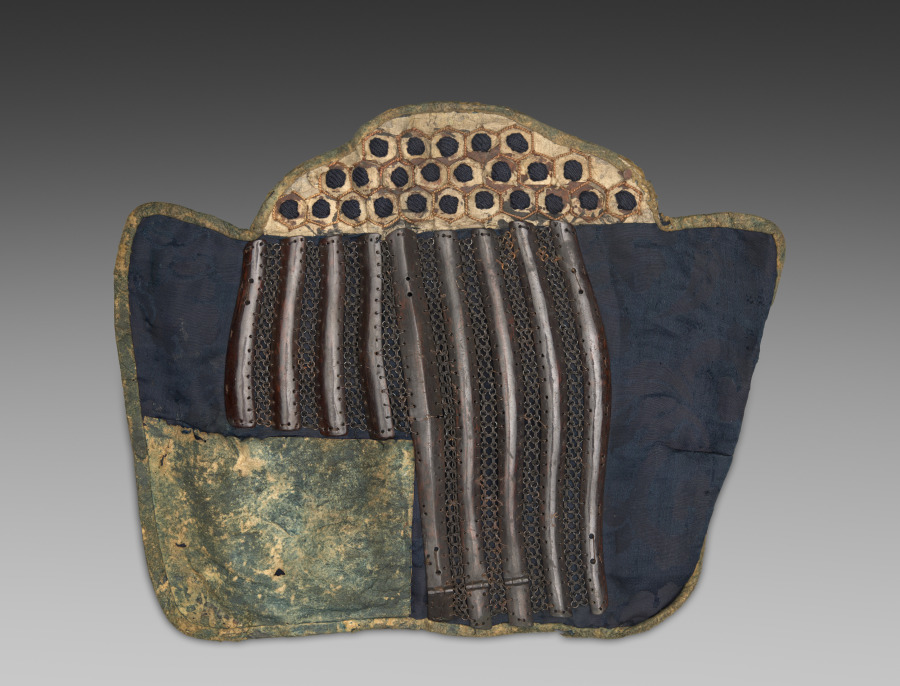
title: Shin Guard (Sune-ate)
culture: Japan, Edo period (1615–1868)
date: 1615–1868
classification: Arms and Armor